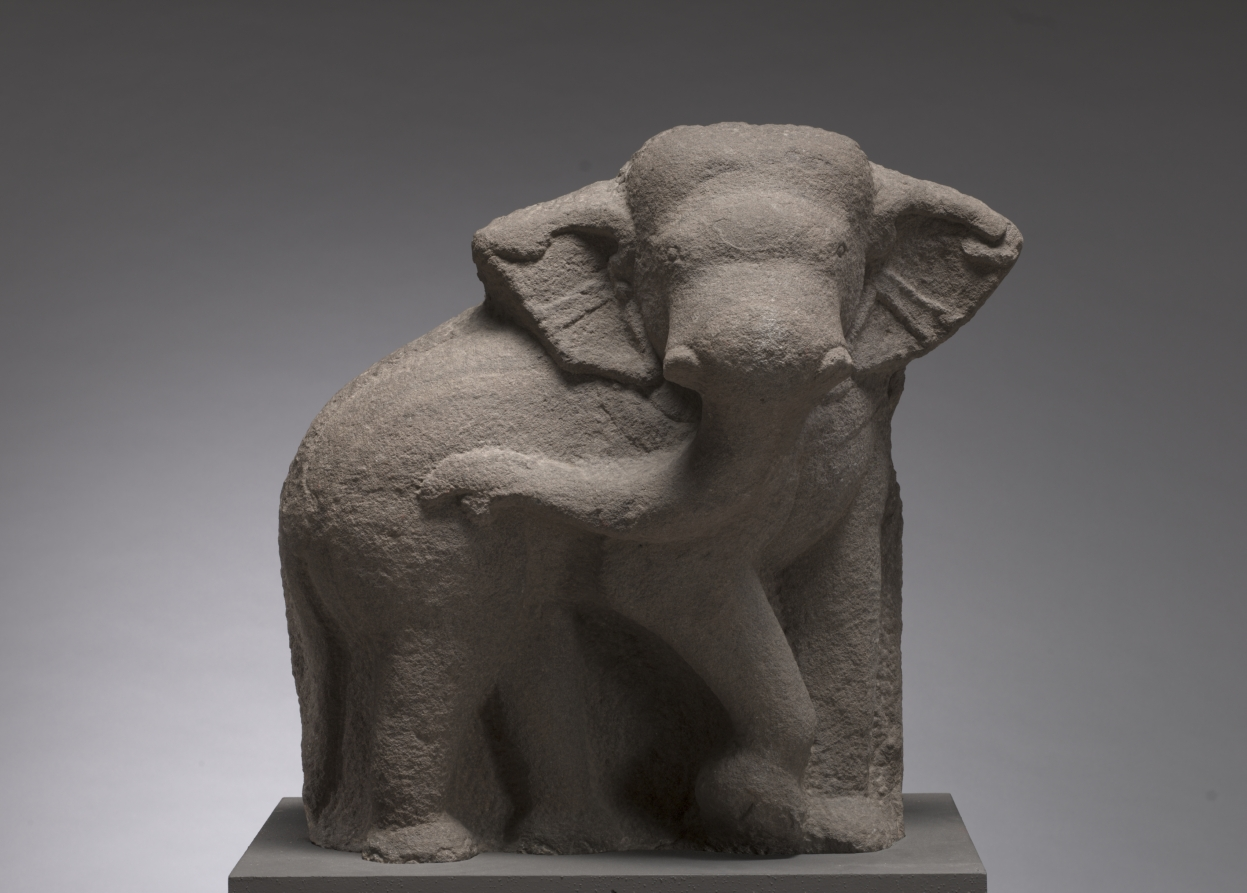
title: Elephant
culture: Vietnam, Tra-Kieu, 1st half of 10th Century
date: 900–950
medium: sandstone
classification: Sculpture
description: The Cham kingdom was located in present-day central Vietnam and was a powerful rival of the Khmer in Cambodia. During the time when this charming, naturalistic elephant sculpture was made, the Cham were actively absorbing stylistic elements from India.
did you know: The elephant's features are worn and softened due to weathering.